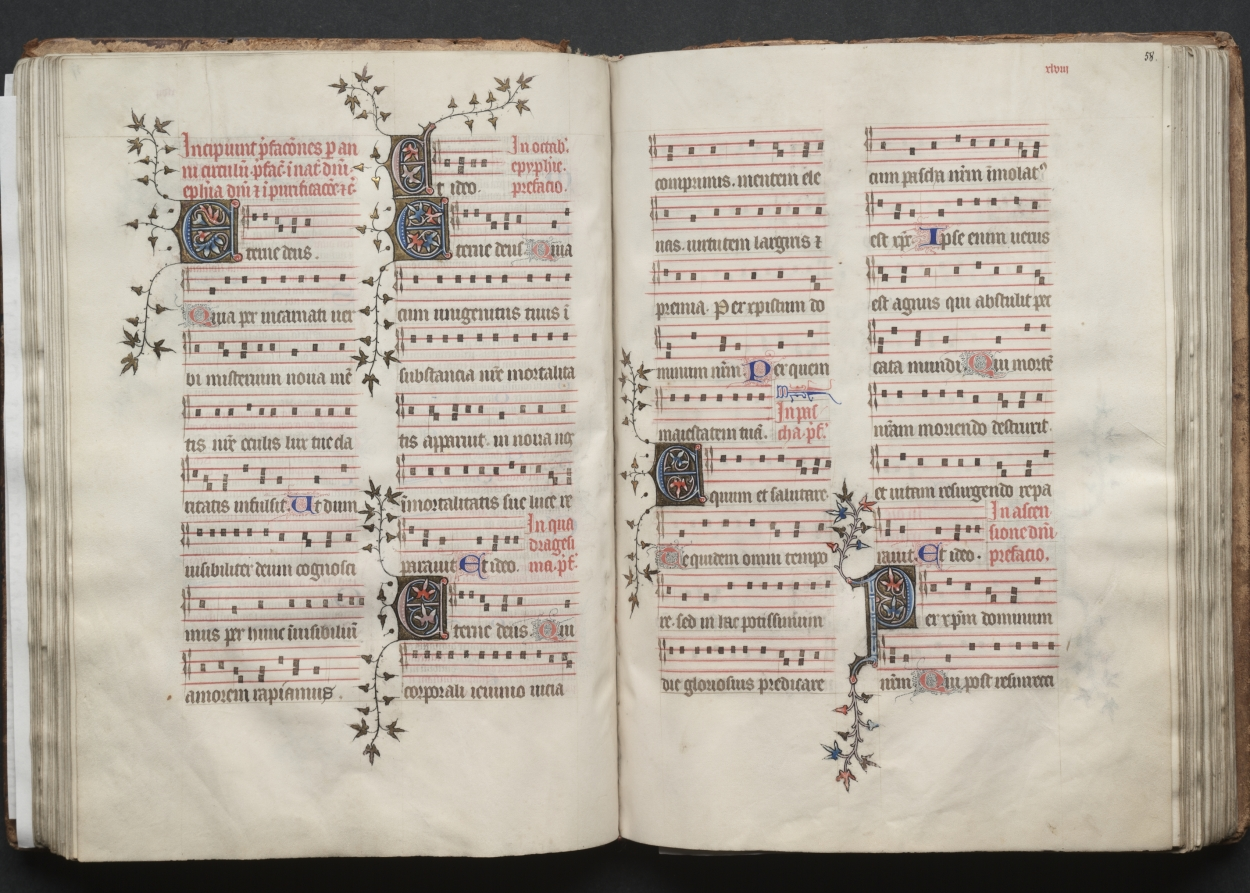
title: The Gotha Missal: Fol. 57v, Text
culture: France, Paris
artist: Master of the Boqueteaux (French)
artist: and Workshop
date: c. 1375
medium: ink, tempera, and gold on vellum; blind-tooled leather binding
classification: Bound Volume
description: The style and quality of this manuscript's decoration is typical of deluxe Parisian books made for aristocratic or royal patrons. Most of the book's decoration appears to be the work of the Master of the Boqueteaux, an artist active at the court of King Charles V (died 1380). His style was apparently shared by a number of book illuminators working in and around Paris. It is very possible that the Gotha Missal belonged to Charles V, but is not provable because the manuscript has no royal portraits and lacks a colophon. Given the book's magnificent decoration, however, it would seem that it was produced for a Valois prince, if not for the king himself. The manuscript receives its name from the German dukes of Gotha, its later owners.